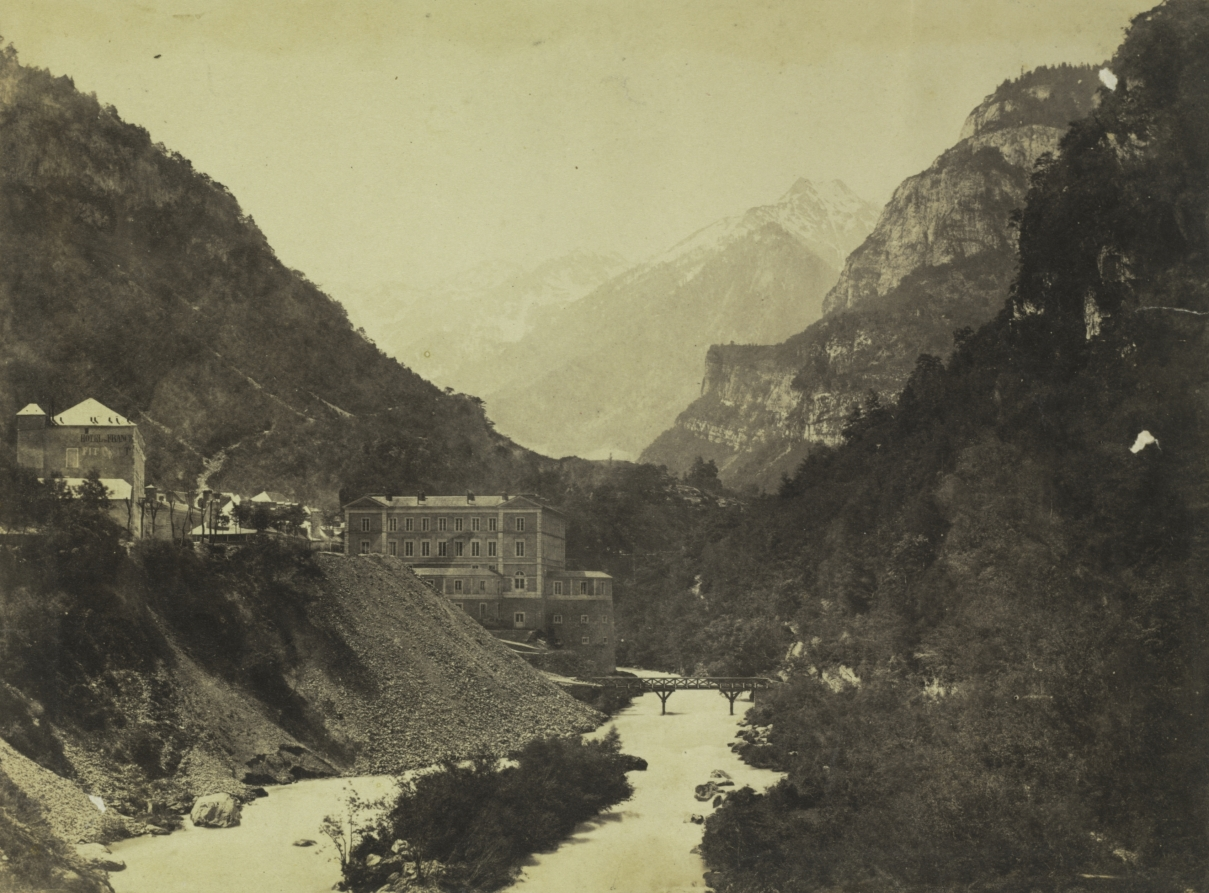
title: Eaux-Chaudes, Pyrenees (verso)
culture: England, 19th century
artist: attributed to Farnham Maxwell Lyte (British, 1828–1906)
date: c. 1855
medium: albumen print from wet collodion negative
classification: Photograph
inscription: Written in ink on recto: "Eaux Chaudes, Pyrenees"; in pencil on recto: "RH"